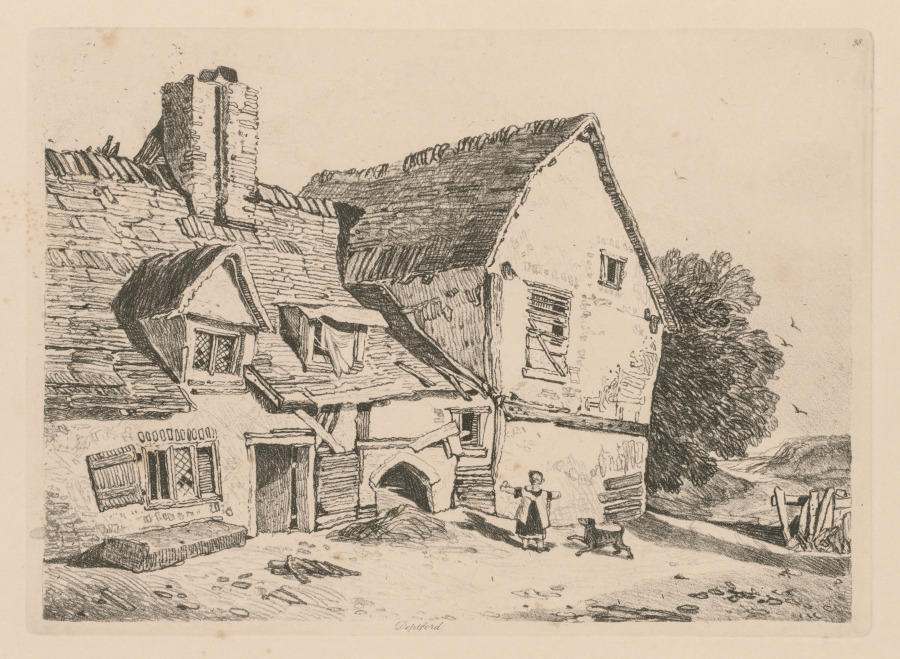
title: Liber Studiorum: Plate 38, View at Deptford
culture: England, 19th century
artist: John Sell Cotman (British, 1782–1842)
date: 1838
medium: softground etching, from a bound volume containing 48 plates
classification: Bound Volume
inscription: In plate, within image, upper right: 38; in plate, below image: Deptford